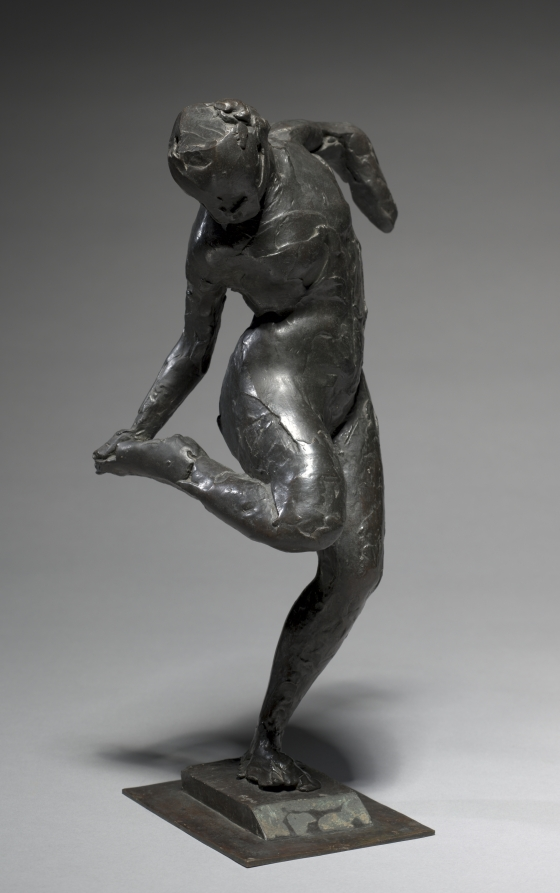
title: Dancer Looking at the Sole of her Right Foot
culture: France, 19th century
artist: Edgar Degas (French, 1834–1917)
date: 1896–97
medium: bronze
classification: Sculpture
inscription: Signed on base at left: Degas. Inscribed behind right foot: 67/B.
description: Degas produced numerous wax sculptures during his lifetime that were cast in bronze shortly after his death. This late work continues his fascination with dancers and the physical sensation of the human body in motion. Marks made by artist's fingers are visible in the bronze surface.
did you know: Degas often frequented the Garnier opera house in Paris to observe the dancers during both onstage performances and backstage rehearsals. Paying careful attention to their movements and poses, he produced nearly 1,500 works depicting ballet dancers, including paintings, drawings, and sculptures.